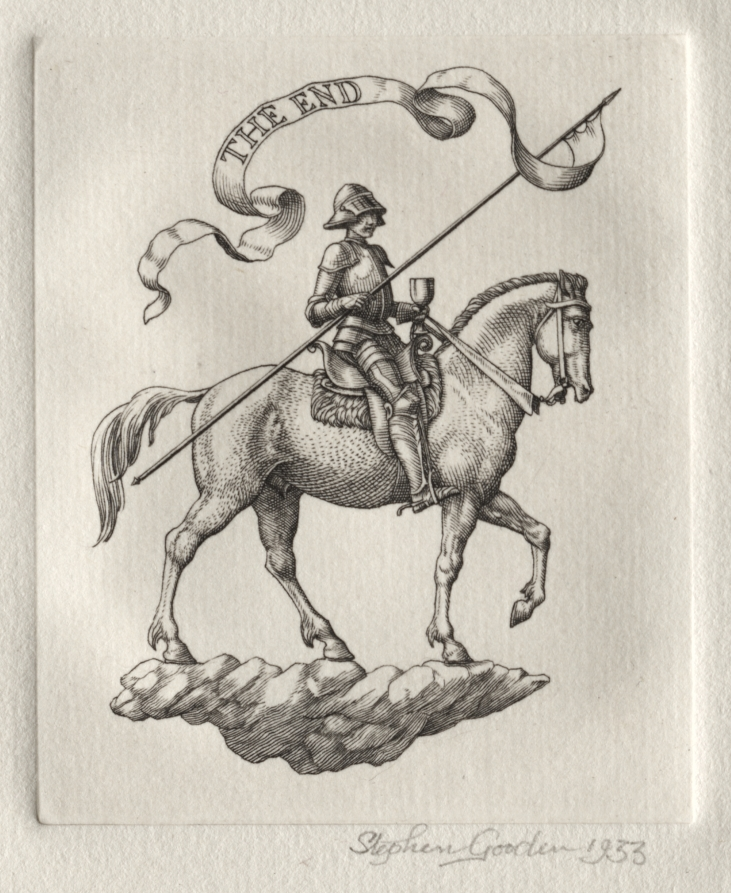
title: Illustration for "Peronnik the Fool": Tailpiece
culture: England, 20th century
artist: Stephen Gooden (British, 1892–1955)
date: 1933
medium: engraving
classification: Print